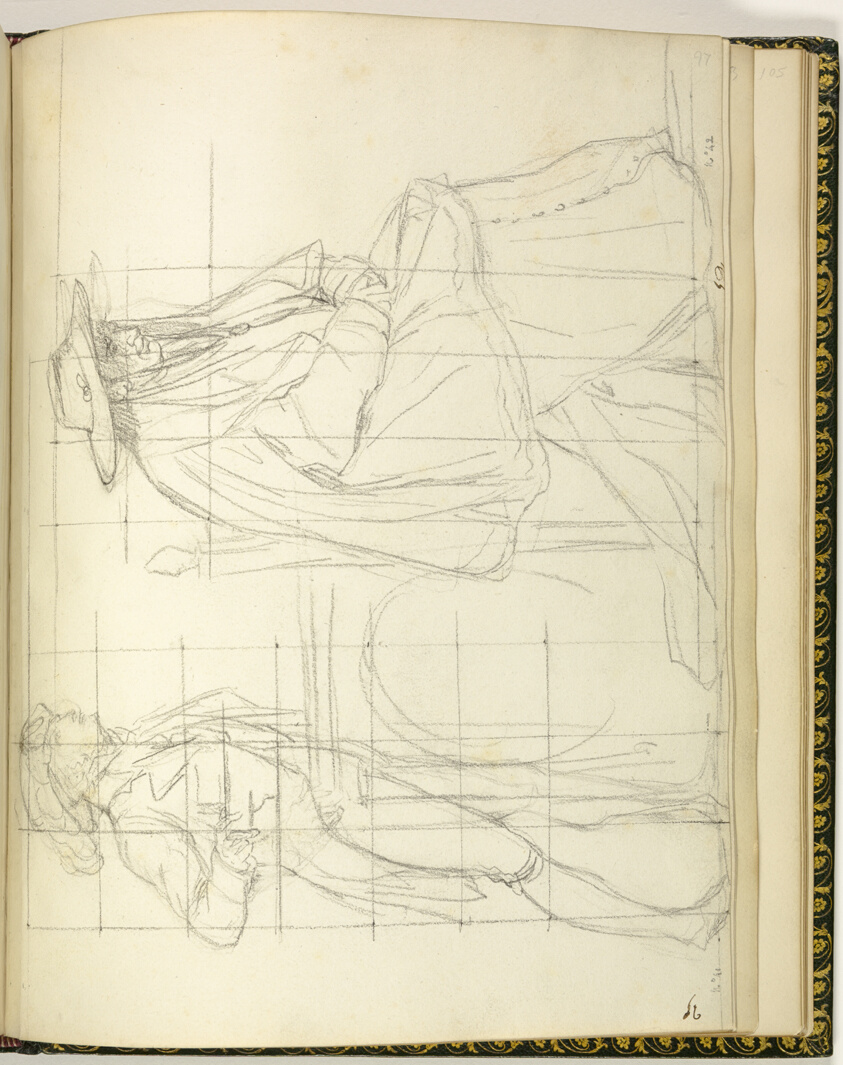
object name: Drawing and Watercolor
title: Sketchbook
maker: Jacques-Louis David; French, 1748-1825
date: 1809–10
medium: Graphite, black chalk, black crayon, and pen and brown ink drawings on wove paper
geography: France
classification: sketchbook; chalk; prints and drawing; paper